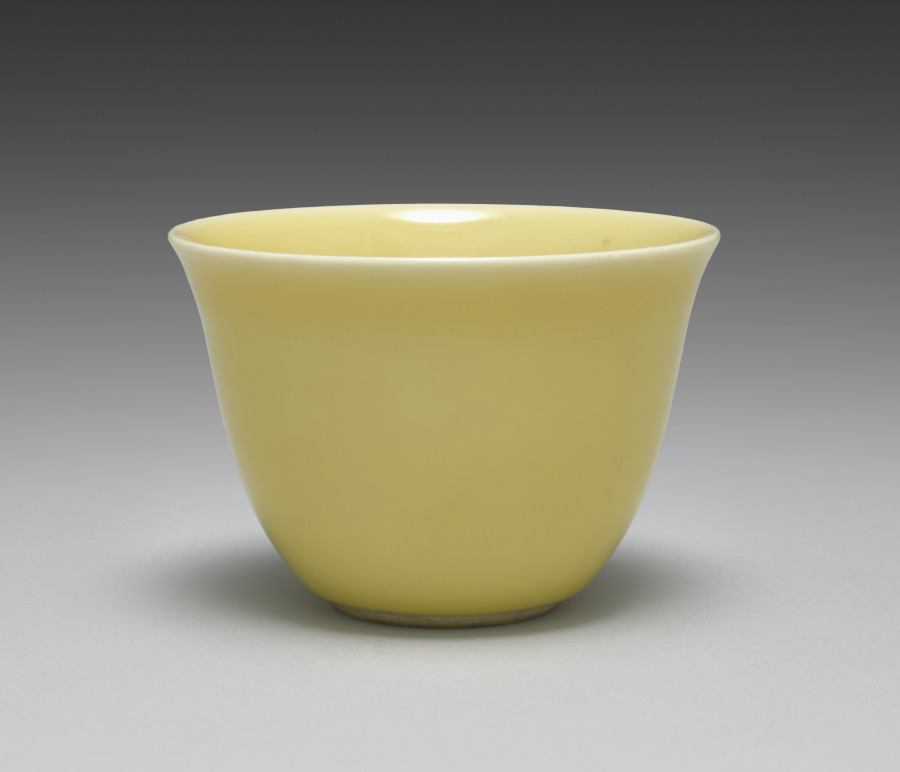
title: Cup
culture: Japan, Taishō period (1912–26) or Shōwa period (1926–89)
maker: Seifū Yohei IV (Japanese, 1872–1951)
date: 1914–46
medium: porcelain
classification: Ceramic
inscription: 清風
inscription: 清風造 【印】成山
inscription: 清風盧人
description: Like his father, Yohei IV also produced works with red or yellow monochrome glazes. His yellow-glazed works include this set of five drinking cups, a pair of sake pourers CMA 2022.216, and a sweets bowl molded into the shape of a chrysanthemum CMA 2022.218.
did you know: Seifū Yohei IV learned the ceramics industry from his father and painting from Tanomura Shosai.